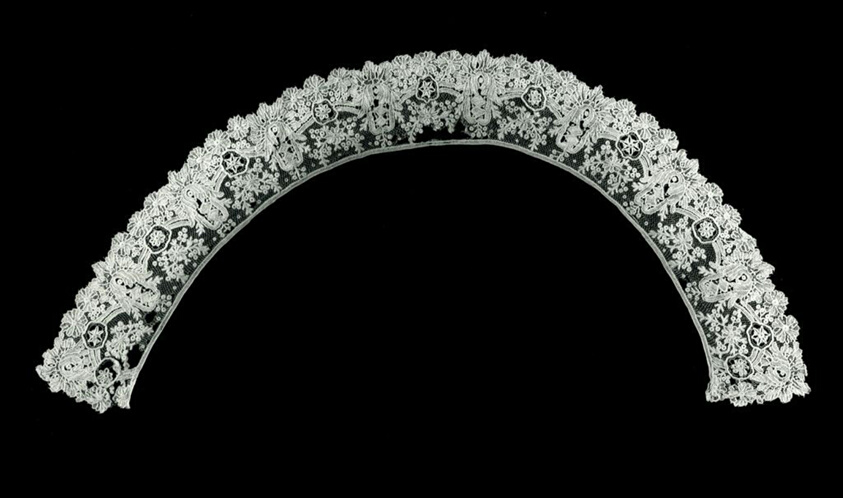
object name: Textile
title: Collar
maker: Belgium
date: 1855/65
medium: Cotton, needle lace of a type known as "Point de Gaze"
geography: Belgium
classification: textile; lace - needle